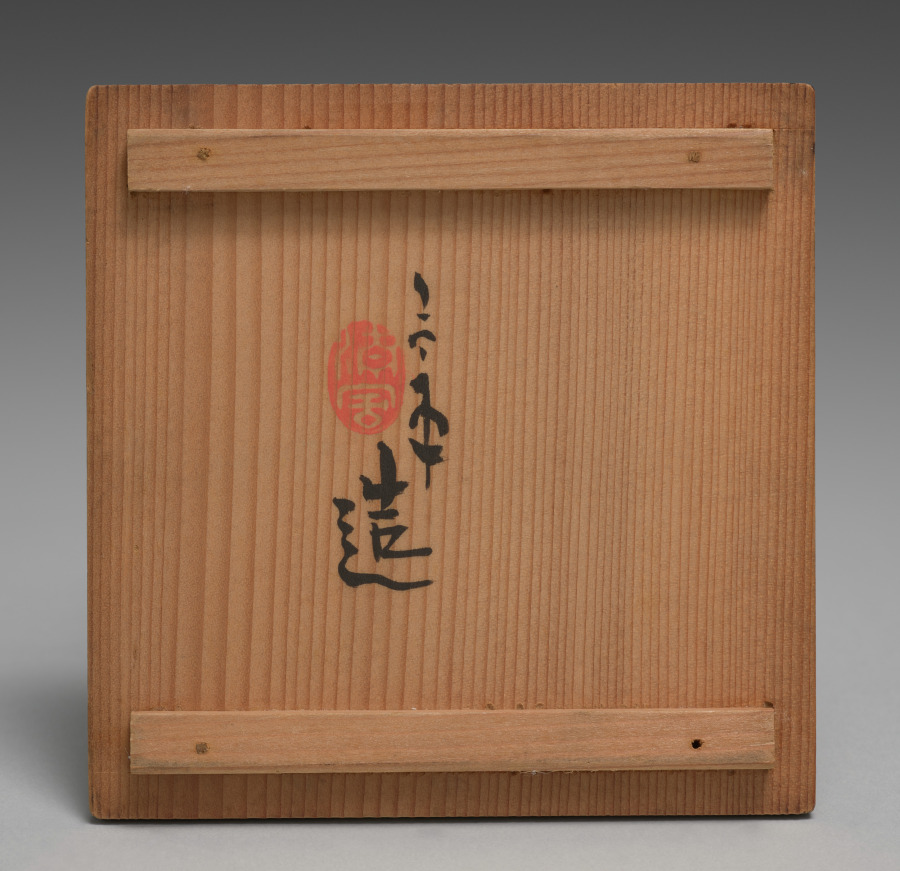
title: Incense Burner with Flowers and Dots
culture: Japan, Meiji period (1868–1912)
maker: Seifū Yohei III (Japanese, 1851–1914)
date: 1893–1914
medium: Porcelain with creamy white translucent glaze and molded and incised design with openwork silver lid in shape of flower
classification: Ceramic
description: Yohei III made incense burners in a wide variety of designs and styles. The body and glaze of this one are taihakuji, or “great white porcelain,” an important early invention Yohei III devised in 1872 that involved the combination of a distinctive translucent, creamy glaze over an ivory-colored clay body. The silver lid is meant to look like a single flower. The vessel has tapering legs with a combined curvilinear and geometric design; the bands encircling the middle have simple, incised flower motifs alternating with single dots.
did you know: This incense burner has floral motifs on both the lid and the burner.